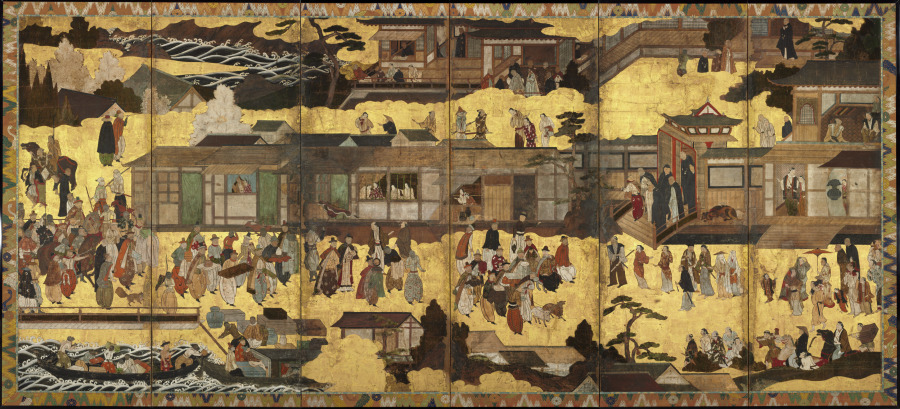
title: Arrival of the "Southern Barbarians"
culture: Japan, Momoyama period (1573–1615)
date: c. 1600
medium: One of a pair of six-panel folding screens; ink, color, and gold on paper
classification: Painting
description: This screen and its corresponding screen show Portuguese merchants arriving in Japan, having crossed the oceans in their large ship with a multinational crew. The Portuguese were known in Japan as the “Southern Barbarians” because they arrived from the south and their customs and manners were unfamiliar to the Japanese, who had not encountered anyone from Europe until their first appearance in 1543. In 1639, the Portuguese were forced out of Japan, mainly owing to internal difficulties caused by their Catholic missionaries, but they were a major conduit for both objects and ideas from Europe for nearly 100 years.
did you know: Europeans were called "Southern Barbarians" because their ships arrived in Japan from the south.